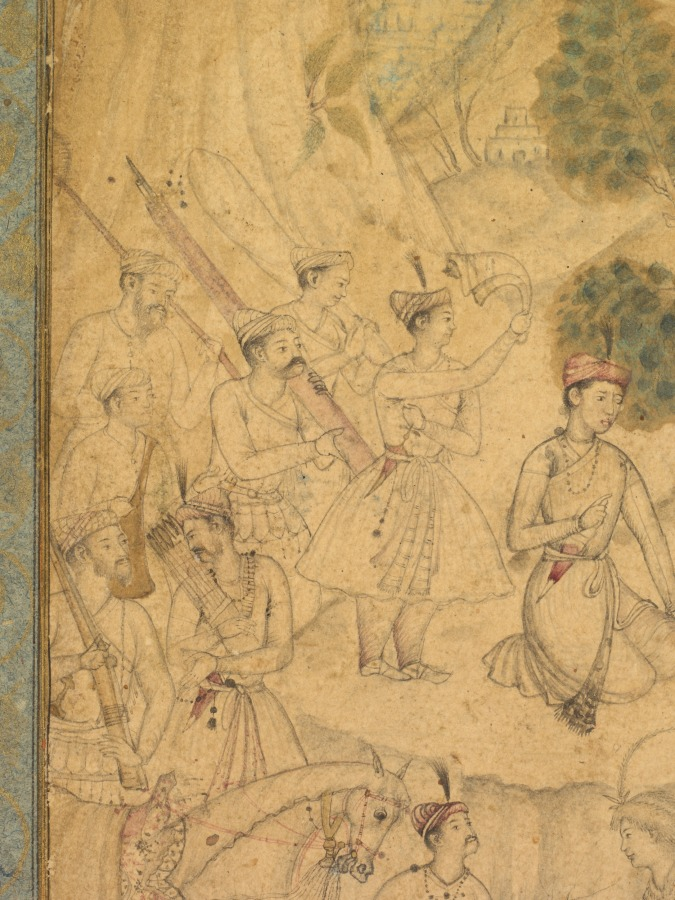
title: A Prince Visiting a Holy Man in a Rocky Landscape (recto)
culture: India, Mughal, 16th century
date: c. 1590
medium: Gum tempera, ink, and gold on paper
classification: Painting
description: A recurring theme in the art of India is the relationship between rulers and the religious practitioners who were believed to control supernatural forces that would aid in the success of rule and war. A prince has come to the abode of a Sufi mystic dervish, who sits with two acolytes in front of a rocky cave that may be his dwelling. The dervish appears to be blessing the prince and the weapons carried by his retinue to help assure success in an upcoming battle. In the foreground, a princely figure leading a horse meets surreptitiously with an eccentric figure holding a squat vessel, possibly filled with a narcotic substance such as bhang, used by many groups of mystics to aid in reaching trance states.